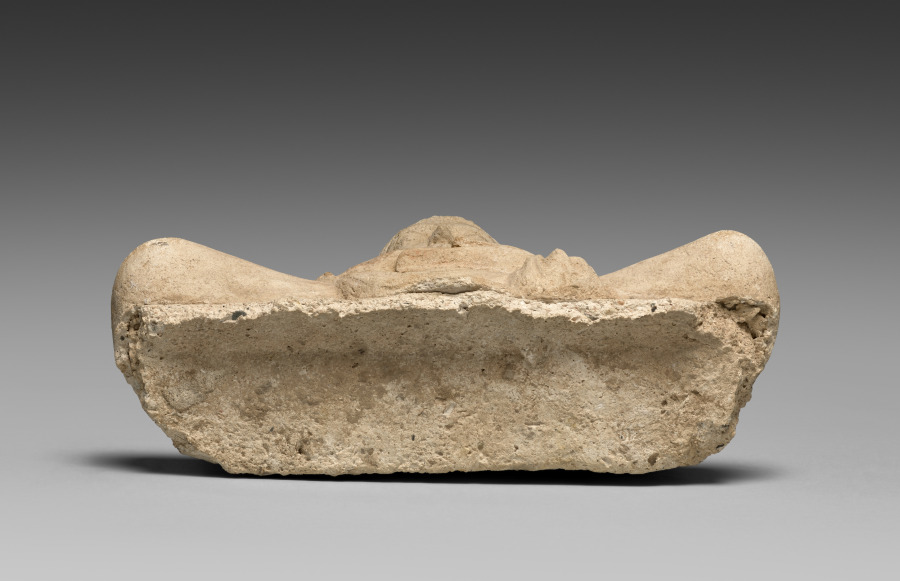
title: Seated Buddha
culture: Afghanistan, Hadda, probably Tape Shotor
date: c. 300 CE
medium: stucco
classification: Sculpture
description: Multiple images of seated Buddhas and related figures surrounded monuments called stupas that enshrined sacred relics. Made of stucco, which is a lime-based plaster material, the backs of the sculptures were fixed to the platform on which the hemispherical stupa was constructed. Visitors would see these images as they venerated the stupas by walking around them reverently, in a clockwise direction. The main stupa at Hadda reportedly contained relics of Shakyamuni Buddha, also known as Siddhartha Gautama, the founder of the Buddhism.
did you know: The way the Buddha holds his hands on his crossed legs indicates that he is shown in meditation.